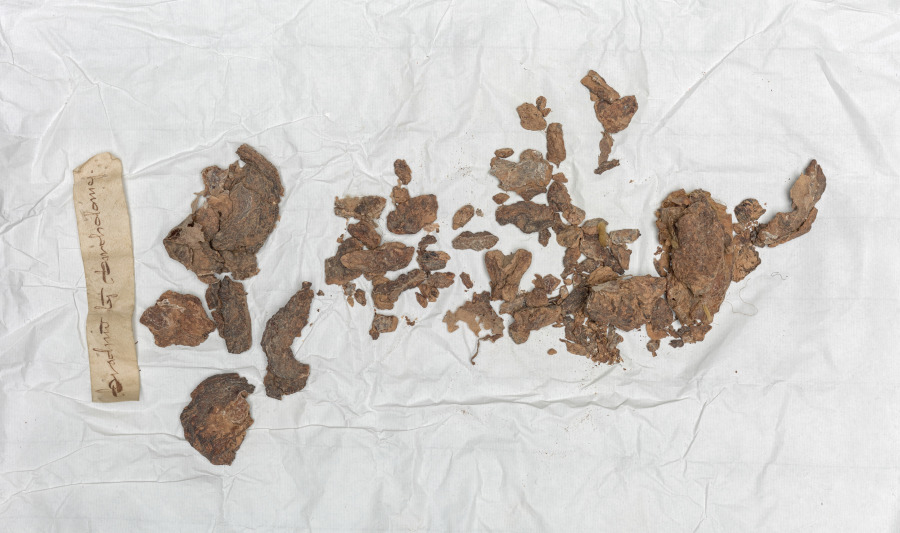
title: Relic of St. Bartholomew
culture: Germany, Lower Saxony?, Romanesque period, 11th century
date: c. 1045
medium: Mummified flesh/tissue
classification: Metalwork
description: This relic is housed in the portable altar commissioned by Countess Gertrude of Brunswick, which is one of the Guelph Treasure’s earliest and most sumptuous objects.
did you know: According to a forensic anthropologist, this material is mummified flesh.